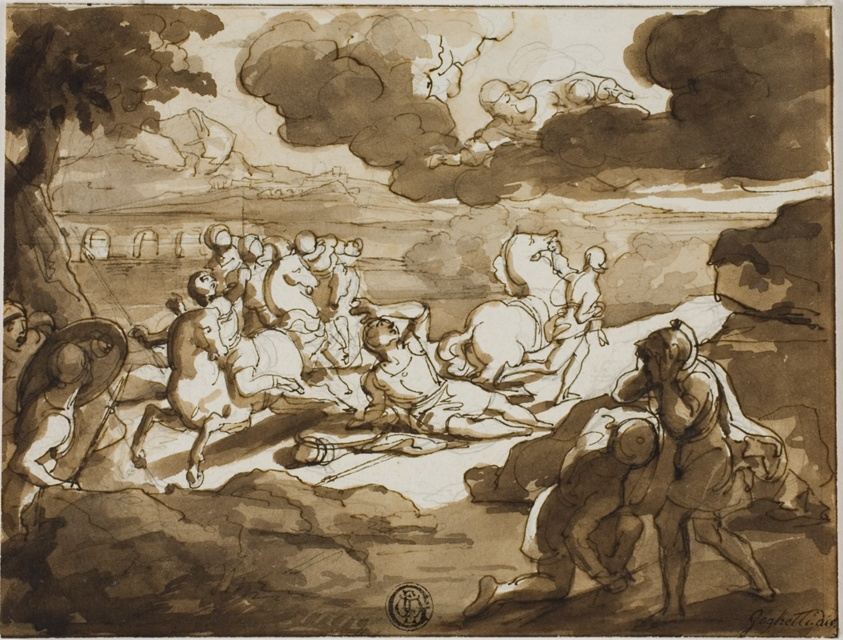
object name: Drawing and Watercolor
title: Conversion of St. Paul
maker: Francesco Coghetti (Italian, 1804-1875)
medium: Pen and brown ink, with brush and brown wash, over graphite, on ivory wove paper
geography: Italy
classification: pen and ink drawings; paper; brush and wash; drawings (visual works); prints and drawing